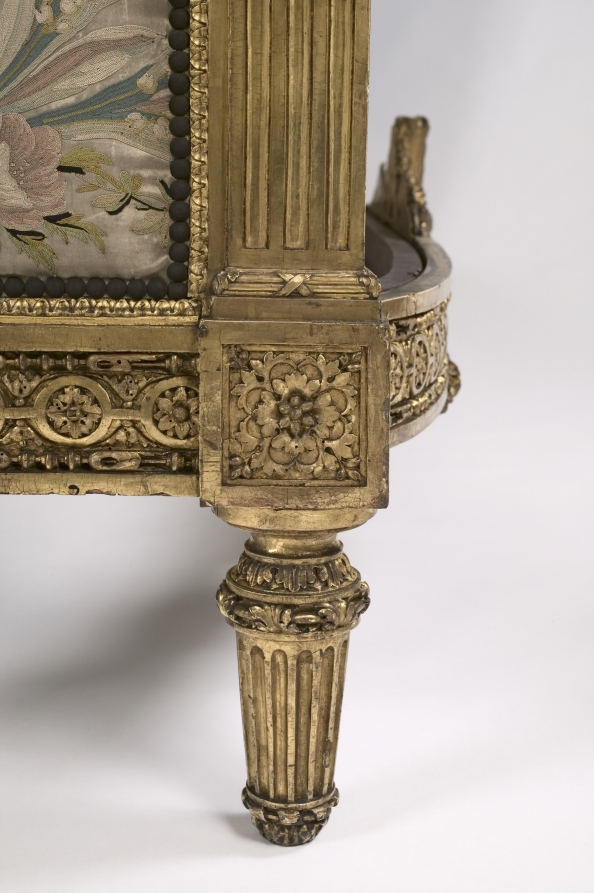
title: Bed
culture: France, 18th century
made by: attributed to Georges Jacob (French, 1739–1814)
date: 1700s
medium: gilded wood and embroidered satin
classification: Furniture and woodwork